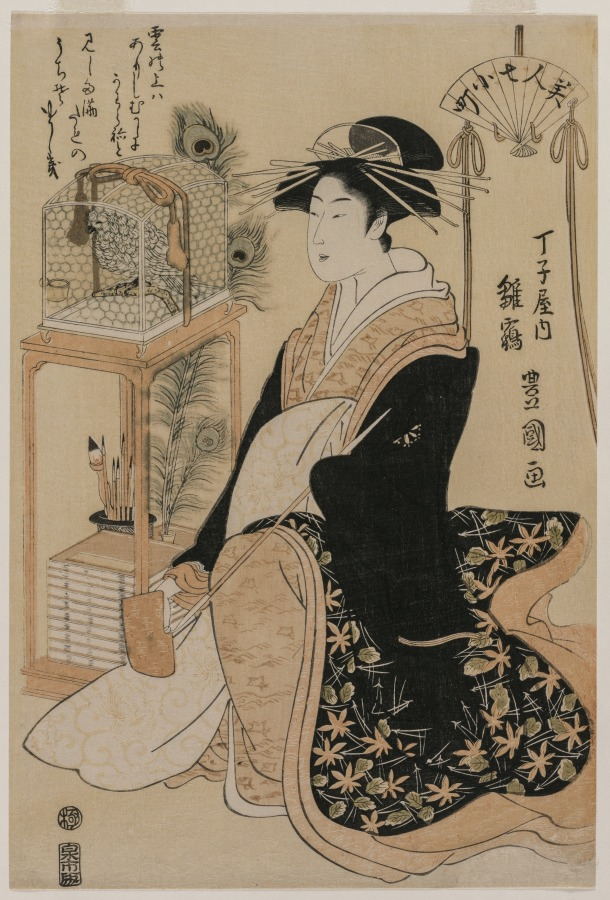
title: Hinazura of Chōjiya from the series Beauties as the Seven Komachi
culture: Japan, Edo period (1615–1868)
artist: Utagawa Toyokuni (Japanese, 1769–1825)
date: c. 1793–97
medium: Color woodblock print; ink and color on paper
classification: Print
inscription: Artist's signature: Toyokuna ga. Publisher: Izumiya Ichibei (Senichi han). Censorship Seal: kiwame.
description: Seven plays based on legends from the life of 9th-century poet Ono no Komachi served as the source for this print series. Hinazura looks at a caged bird, symbolizing the play The Parrot, in which Komachi responds to a poem sent to her by the Emperor Yozei with a poem with just one syllable changed.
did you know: The courtesan seated on the floor holds a tobacco pipe and pouch.